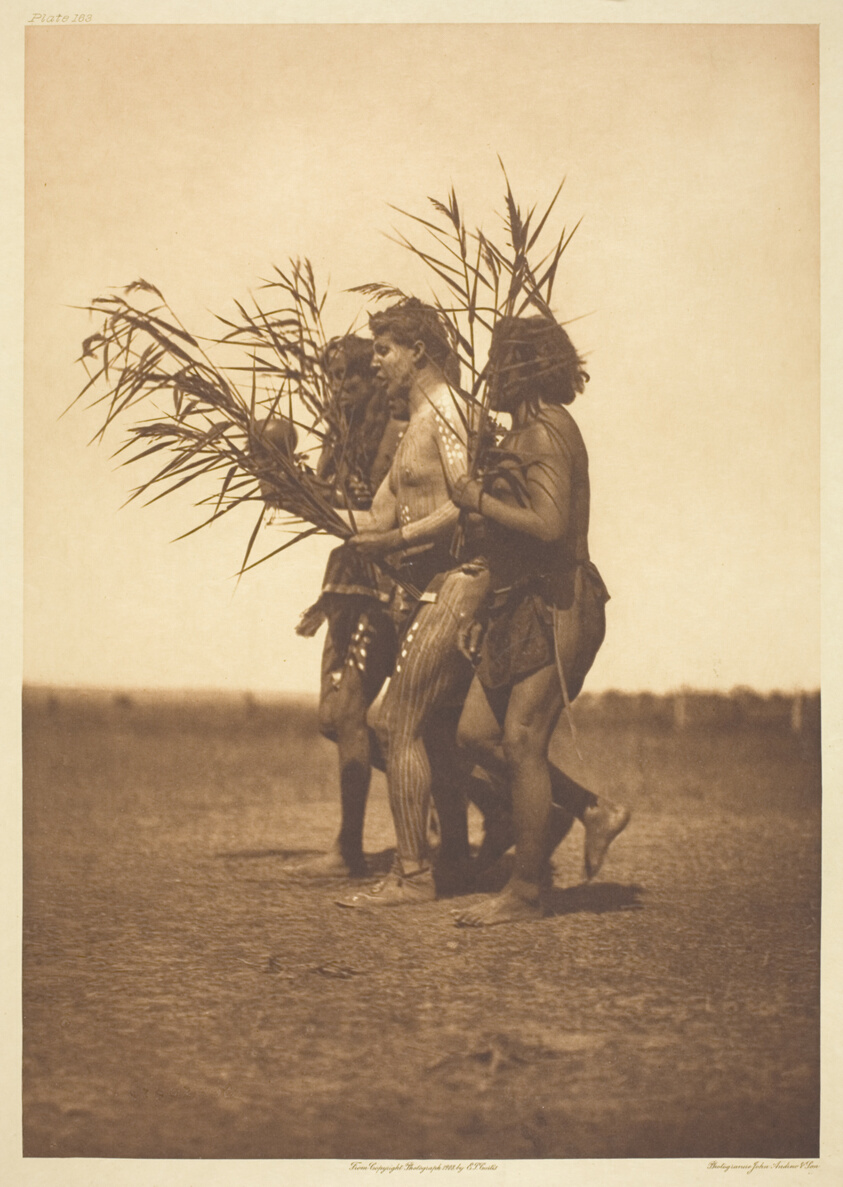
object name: Photograph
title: Arikara Medicine Ceremony - the Ducks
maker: Edward S. Curtis (American, 1868–1952)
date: 1908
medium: Photogravure, plate 163 from "The North American Indian, Volume 5" (1909)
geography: United States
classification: photogravure; photomechanical process; photography; photograph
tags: portraits, portraits: male subject, photography, portraits: Native American subject, portraits: multiple subjects